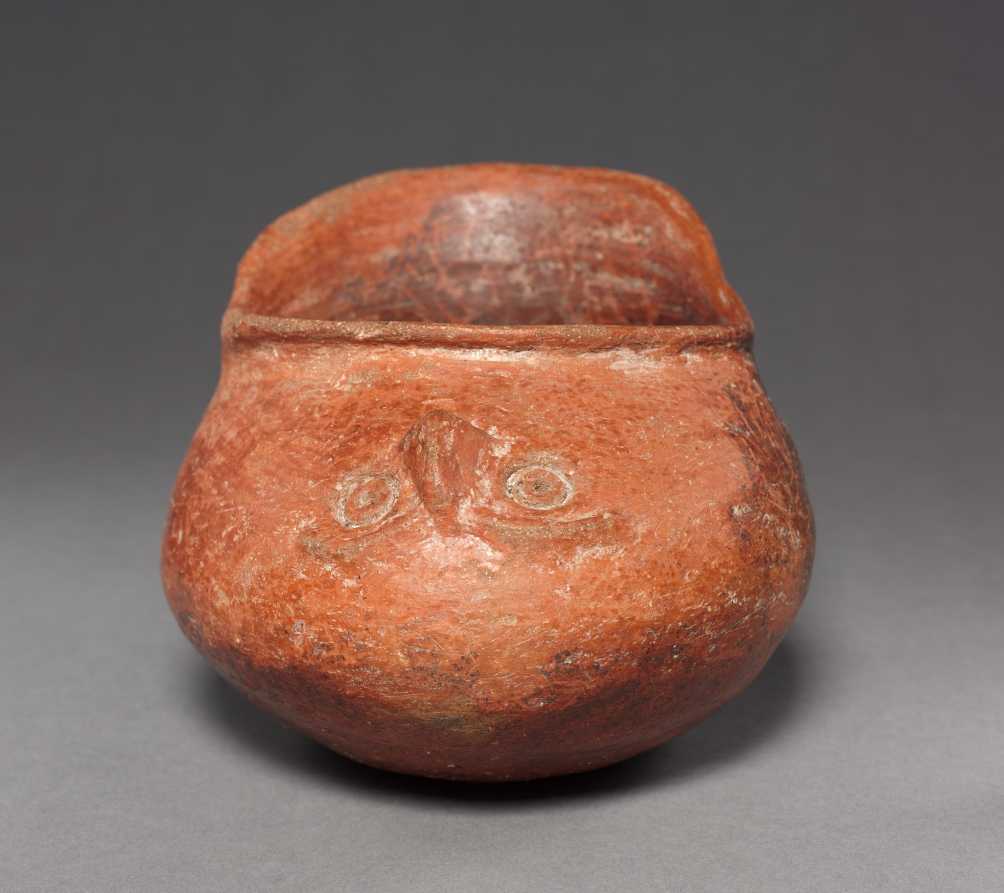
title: Head Effigy Bowl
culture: Mexico, Region of Tilantongo, District of Tlaxiaco, Nayarit style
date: 100 BCE–300 CE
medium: pottery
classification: Ceramic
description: After about 200 BC, West Mexican chieftains gained in authority, their new status reflected in shaft tombs that shelter not only their remains but also lavish offerings, including sculptural ceramics. Many of the ceramics may refer to the crucial activities of a chief’s life, such as marriage, feasting, and war. The meaning of this unusual bowl—a head whose gaping mouth serves as the aperture—is unknown.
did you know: Ancient Nayarit art is celebrated for its timeless, often lighthearted expressions of humanity.